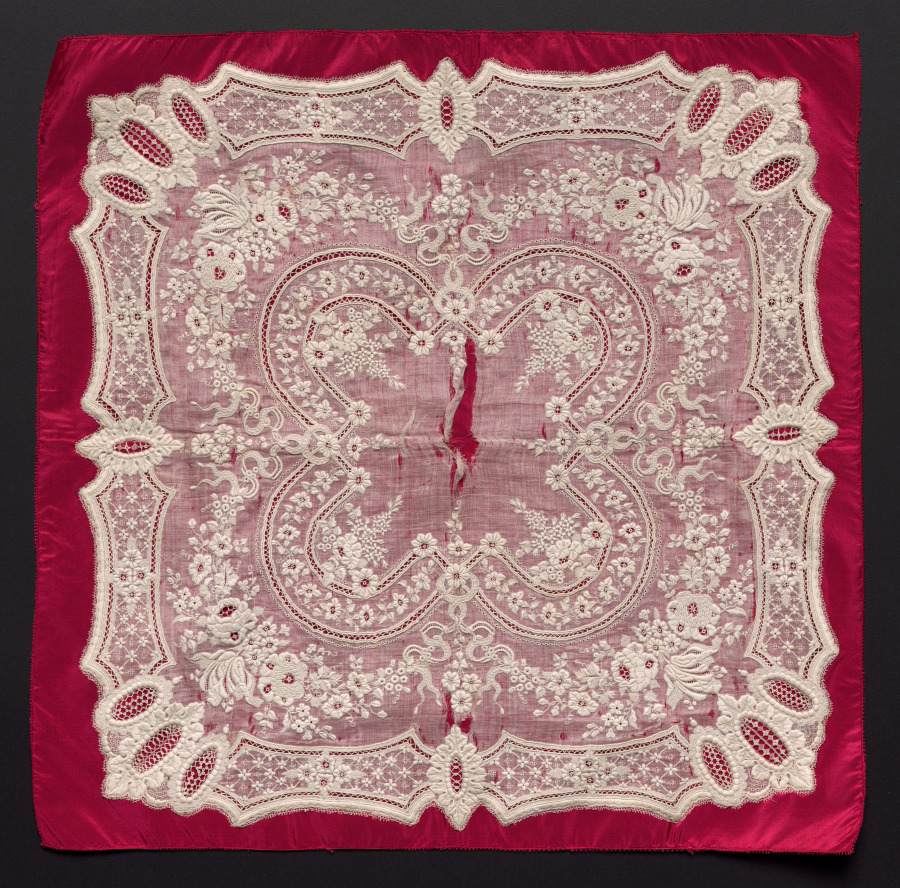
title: Handkerchief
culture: France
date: 1800s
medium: Plain weave linen: embroidered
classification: Embroidery